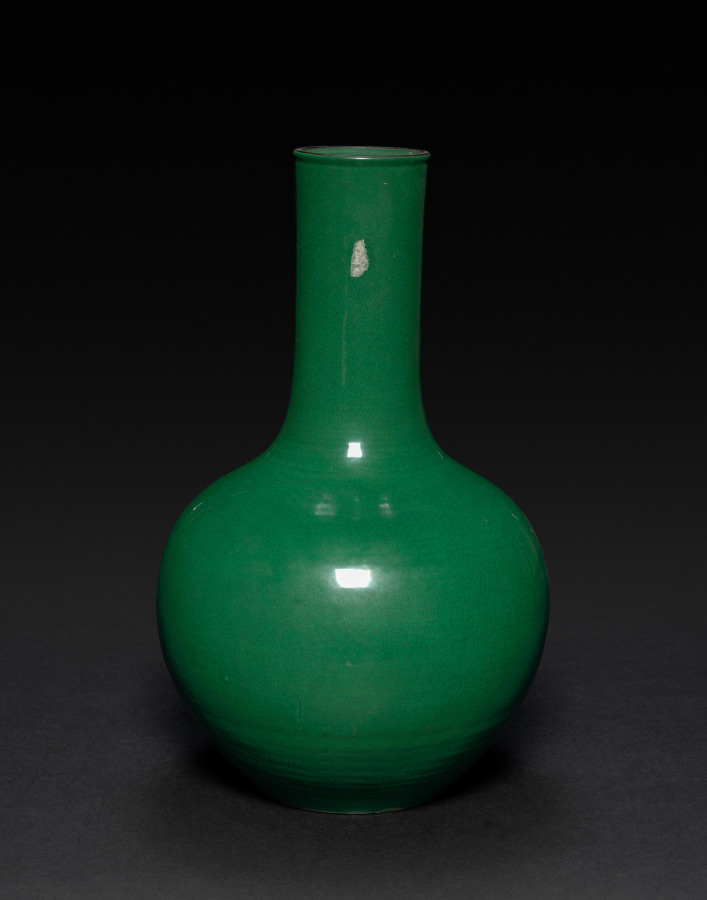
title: Bottle-shaped Vase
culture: China, Qing dynasty (1644–1911), Qianlong reign (1736–95)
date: 1736–95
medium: porcelain with green glaze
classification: Ceramic